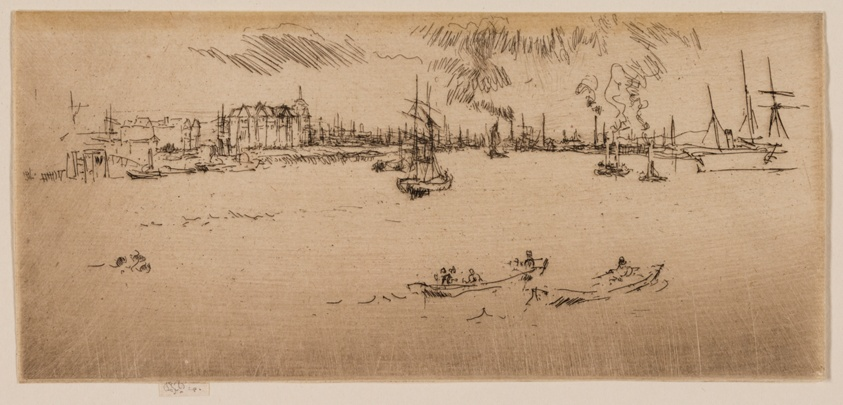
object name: Print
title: Tilbury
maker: James McNeill Whistler (American, 1834-1903)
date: 1887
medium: Etching and drypoint with foul biting in black ink on cream wove paper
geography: United States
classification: etching; foul biting; print; prints and drawing; drypoint; paper